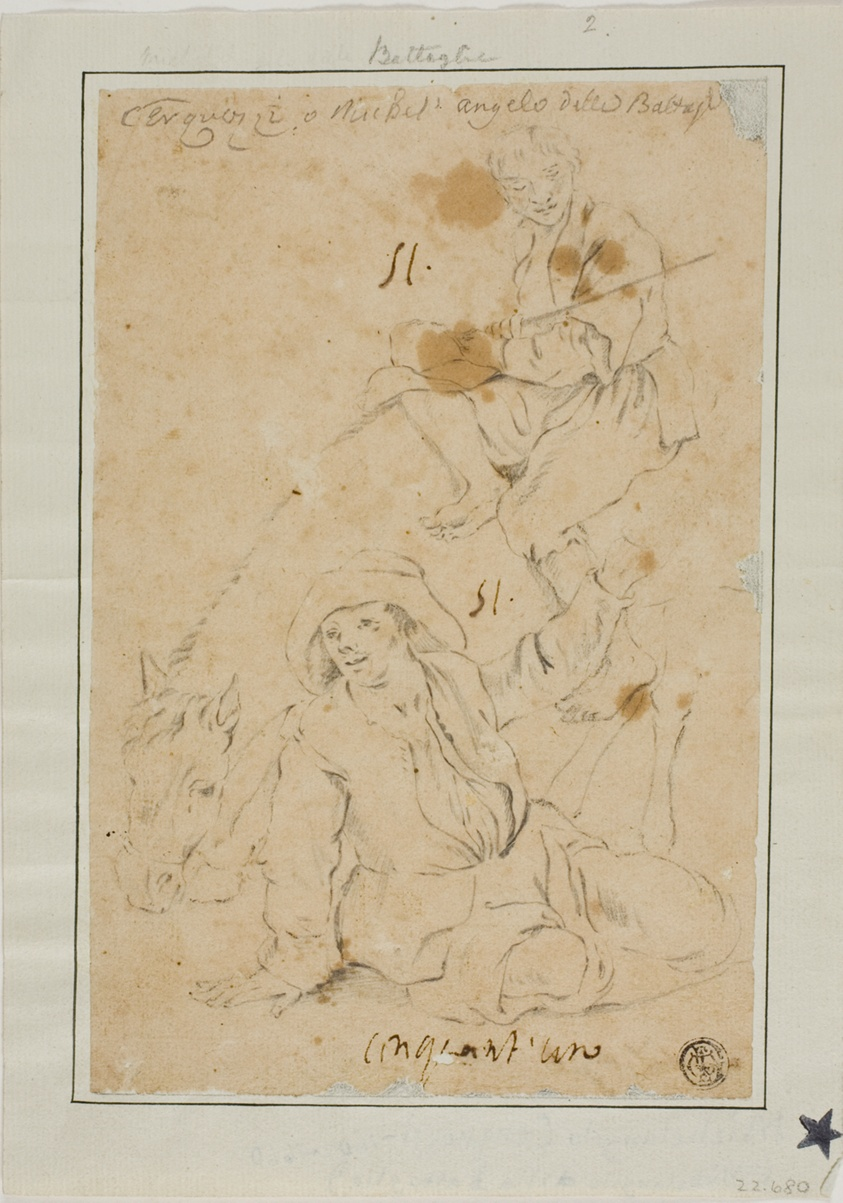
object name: Drawing and Watercolor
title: Two Peasants with Donkey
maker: Attributed to or possibly after Michelangelo Cerquozzi; Italian, 1602-1660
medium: Graphite on tan laid paper, laid down on ivory laid paper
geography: Italy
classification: graphite; drawings (visual works); prints and drawing